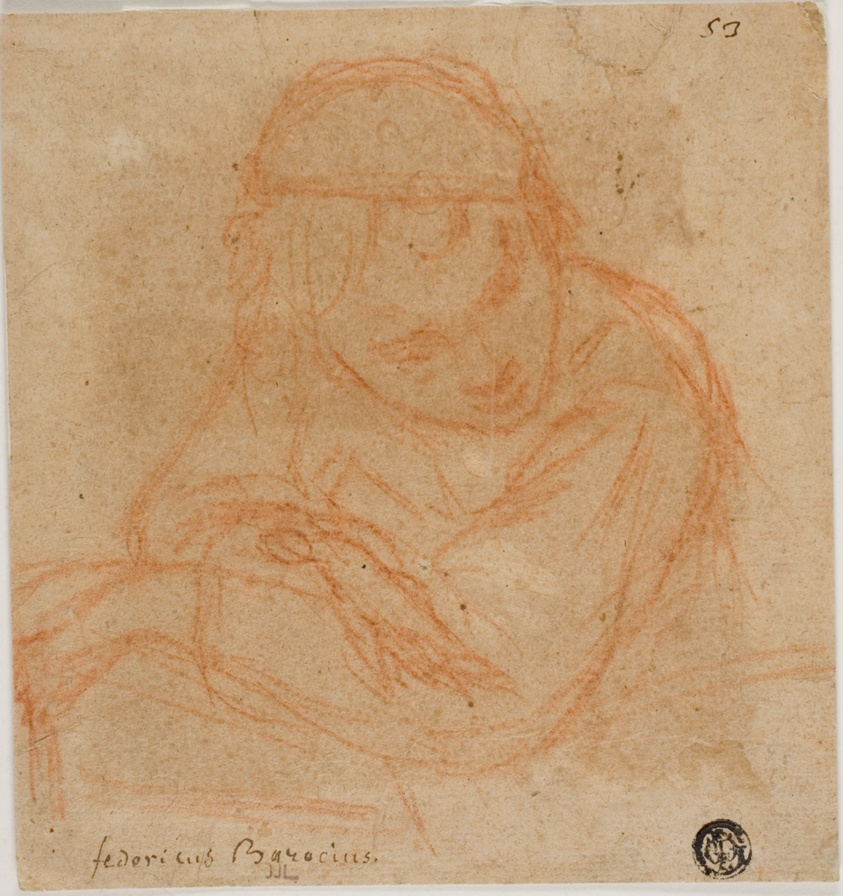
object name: Drawing and Watercolor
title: Half Length Sketch of Girl with Crossed Arms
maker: Unknown Italian artist (16th century); or Bartolomeo Schedoni (Italian, 1578-1615); or Federico Barocci (Italian, 1526-1612)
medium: Red chalk on buff laid paper, laid down on ivory laid paper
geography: Italy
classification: chalk; paper; drawings (visual works); prints and drawing